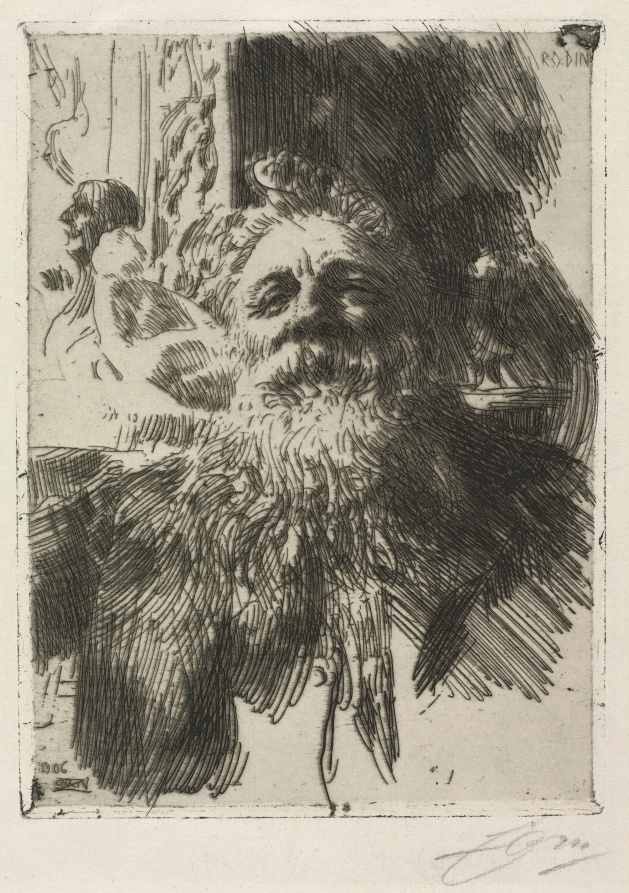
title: Auguste Rodin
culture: Sweden, 20th century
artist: Anders Zorn (Swedish, 1860–1920)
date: 1906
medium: etching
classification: Print